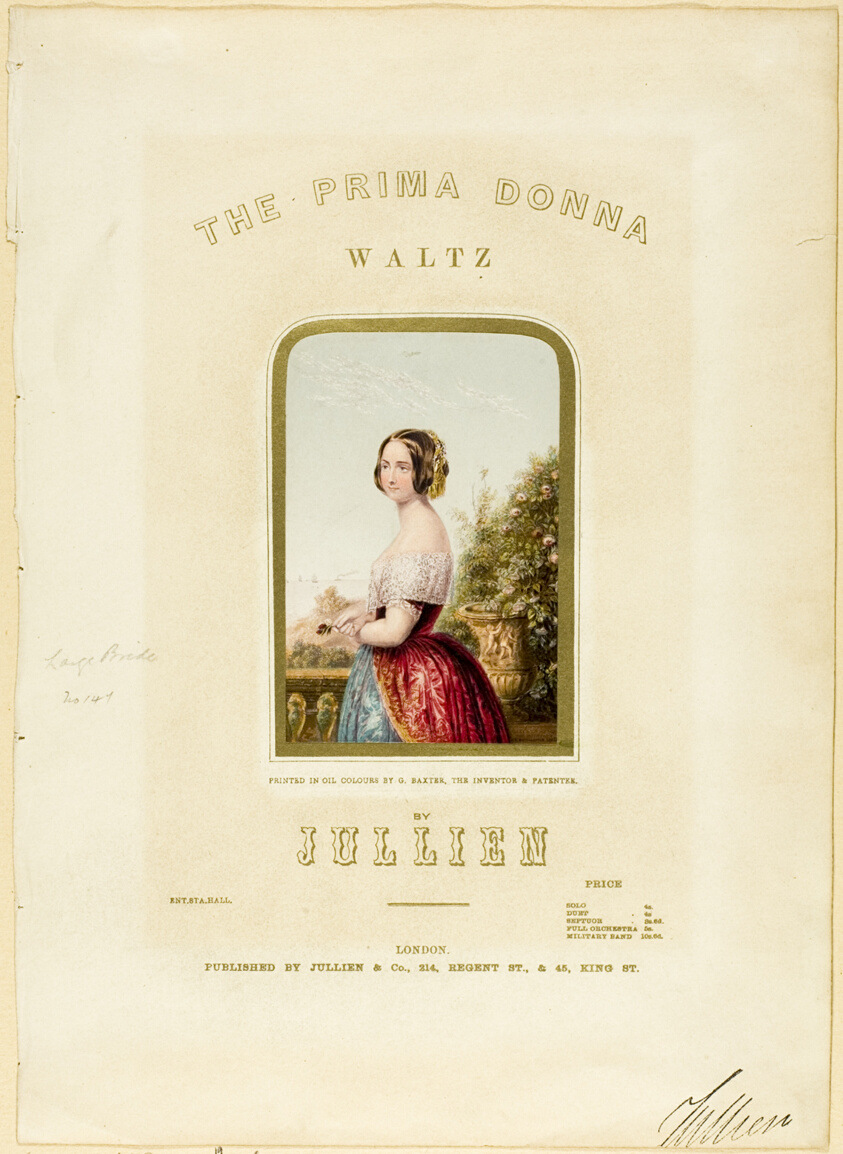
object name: Print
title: The Bride, cover for The Prima Donna Waltz sheet music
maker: George Baxter (English, 1804-1867); composed by Louis Jullien (French, 1812-1860)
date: 1850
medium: Steel engraving colored with wooden blocks on ivory wove paper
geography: England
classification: wood engraving; print; prints and drawing